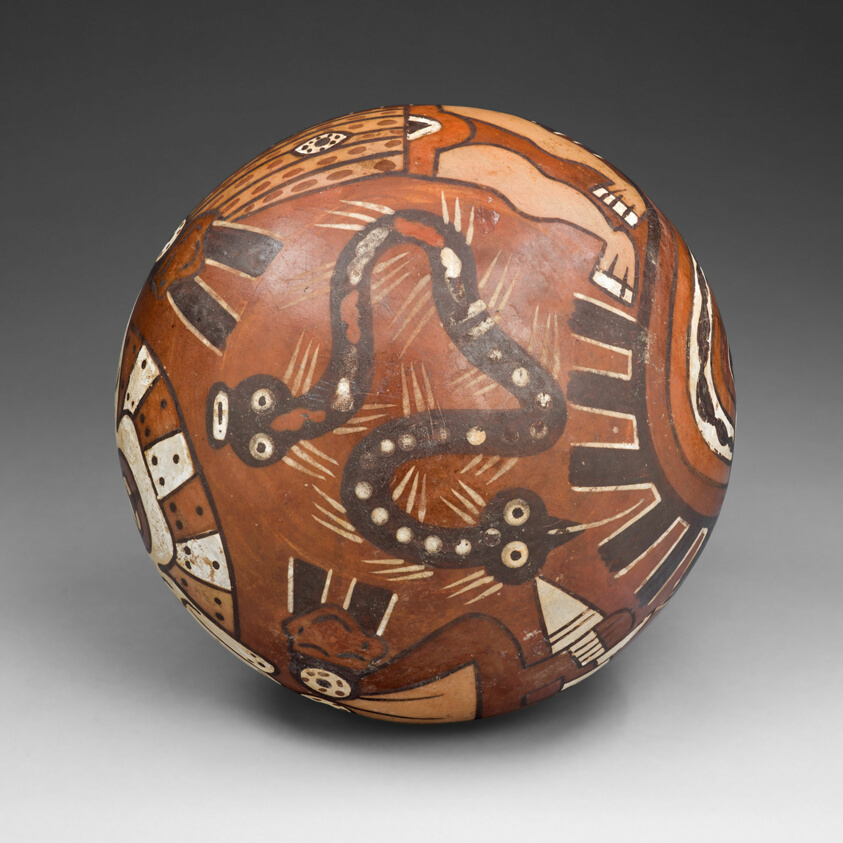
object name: Vessel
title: Vessel Depicting a Costumed Ritual Performer Holding a Staff and a Trophy Head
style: nazca, early intermediate period, Pre-Columbian, americas, Arts of the Americas, andean, andes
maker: Nazca; South coast, Peru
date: 180 BCE–500 CE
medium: Ceramic and pigment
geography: Peruvian South Coast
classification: earthenware; art of the americas; ceramics; vessel